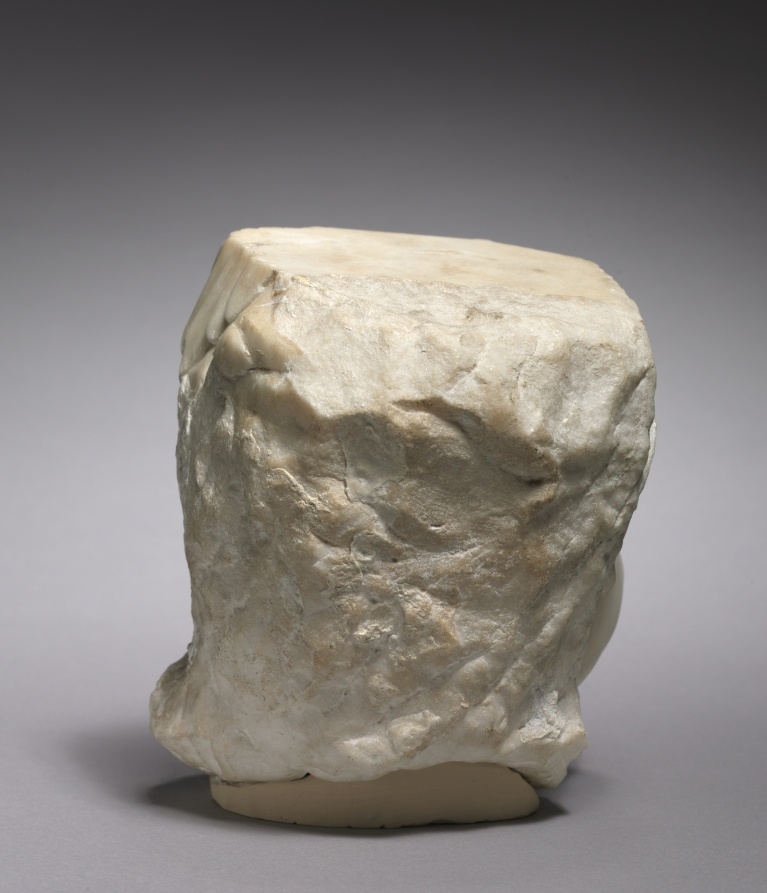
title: Head of a Putto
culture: Italy, Florence, 15th century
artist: follower of Desiderio da Settignano (Italian, 1429/32–1464)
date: 1450–1475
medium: marble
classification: Sculpture